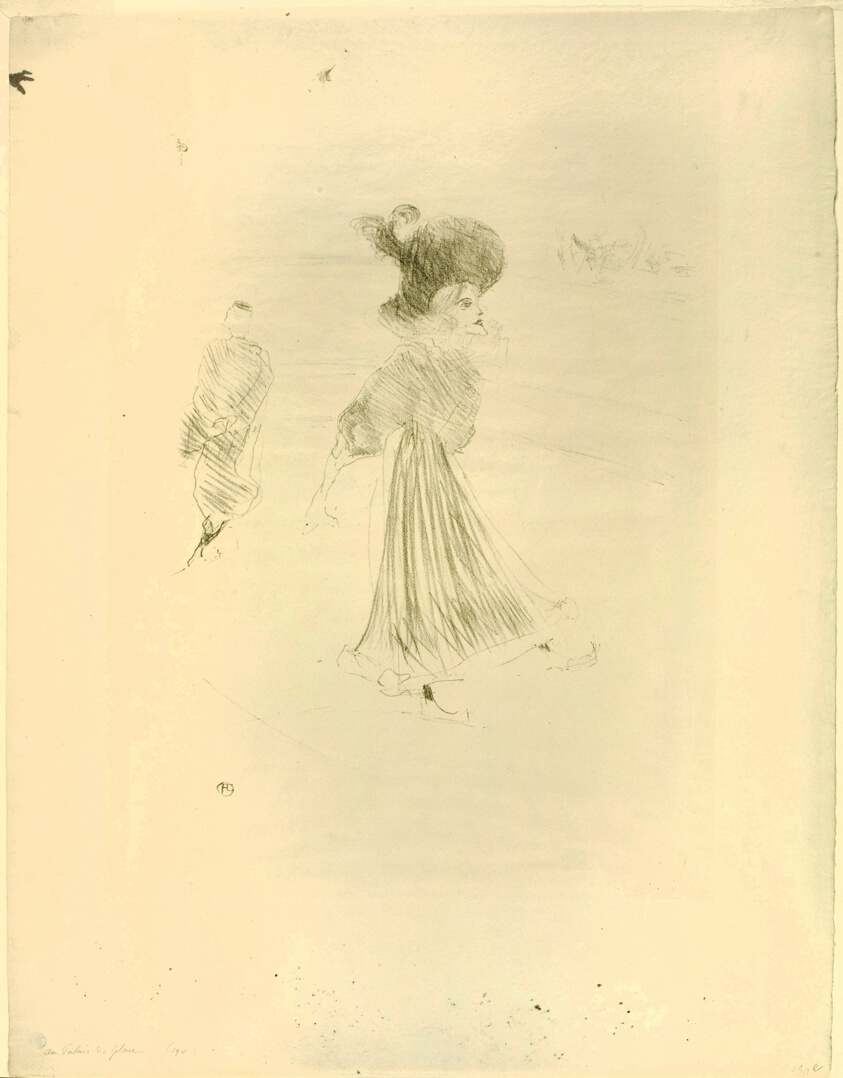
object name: Print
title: At the Ice Palace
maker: Henri de Toulouse-Lautrec (French, 1864-1901)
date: 1895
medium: Color lithograph on cream wove paper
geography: France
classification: lithograph; print; prints and drawing